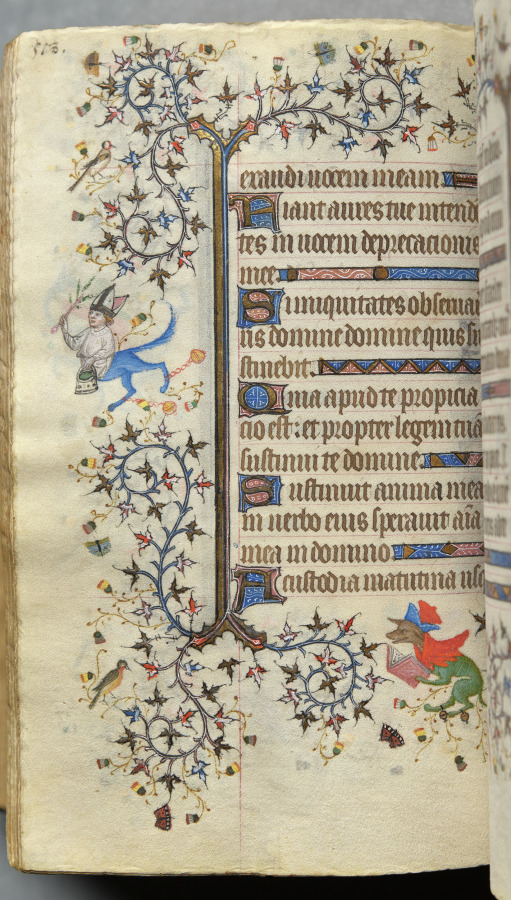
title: Hours of Charles the Noble, King of Navarre (1361-1425)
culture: France, Paris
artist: Master of the Brussels Initials and Associates (French)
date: c. 1405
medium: ink, tempera, and gold on vellum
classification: Bound Volume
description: This precious volume was obviously highly prized by its owner, the French-born King of Navarre, who had his coat of arms painted on no less than twenty folios. Rather than directly commissioning this manuscript from a specific workshop, it seems that Charles the Noble acquired his book of hours -- perhaps ready-made for the luxury market -- while on a trip to Paris in 1404-05. A collaborative effort, six painting styles are evidenced within the pages of this codex, those of two Italians, two Frenchmen, and two Netherlanders. The painter who was responsible for the planning and decoration of the book, and who produced seventeen of the large miniatures, was a Bolognese artist known as the Master of the Brussels Initials. His principal assistant, responsible for most of the borders, was a Florentine who signed his name "Zecho" da Firenze on folio 208 verso.